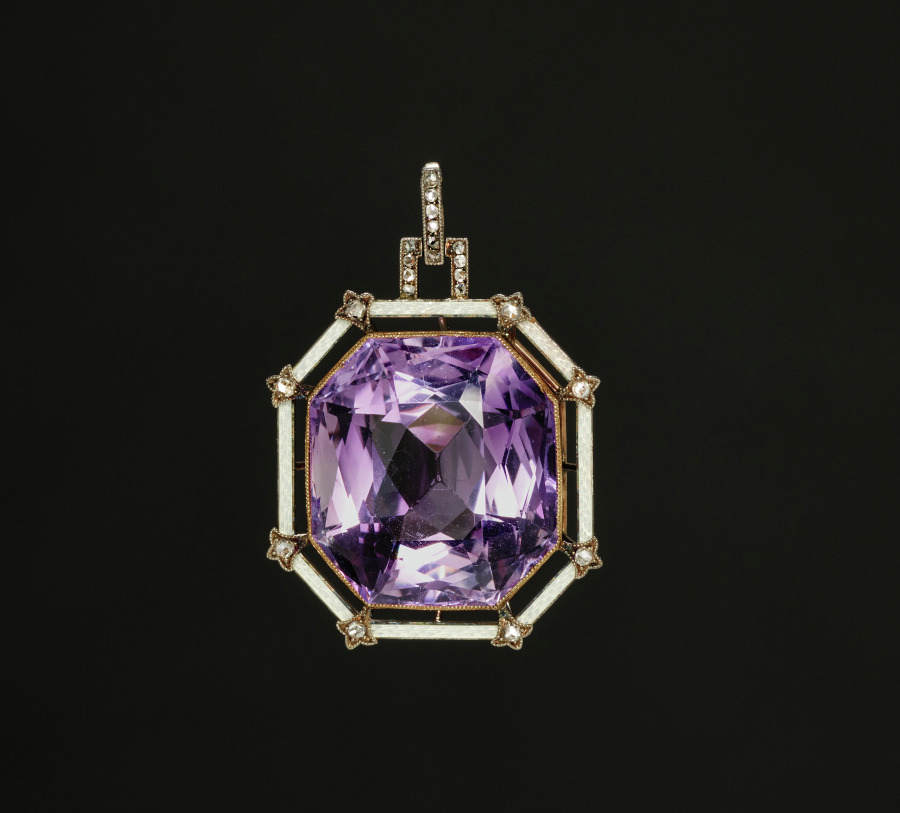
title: Pendant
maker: House of Fabergé (Russian, 1842–1918)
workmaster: Albert Holmström (Finnish, 1876–1925)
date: c. 1910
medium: amethyst, guilloché enamel, diamonds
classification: Jewelry